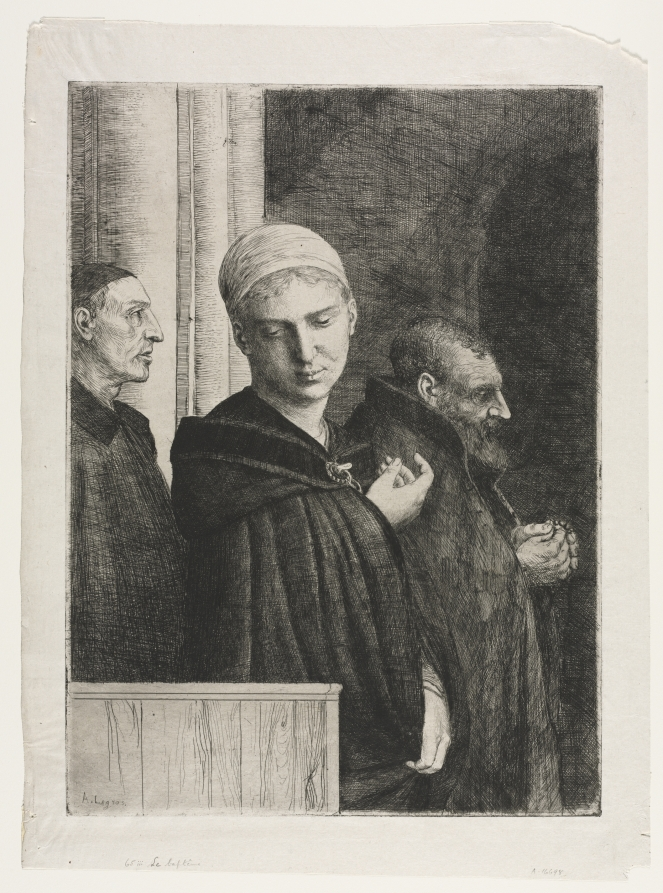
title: The Baptism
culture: France, 19th century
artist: Alphonse Legros (French, 1837–1911)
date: c. 1857–1911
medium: etching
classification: Print